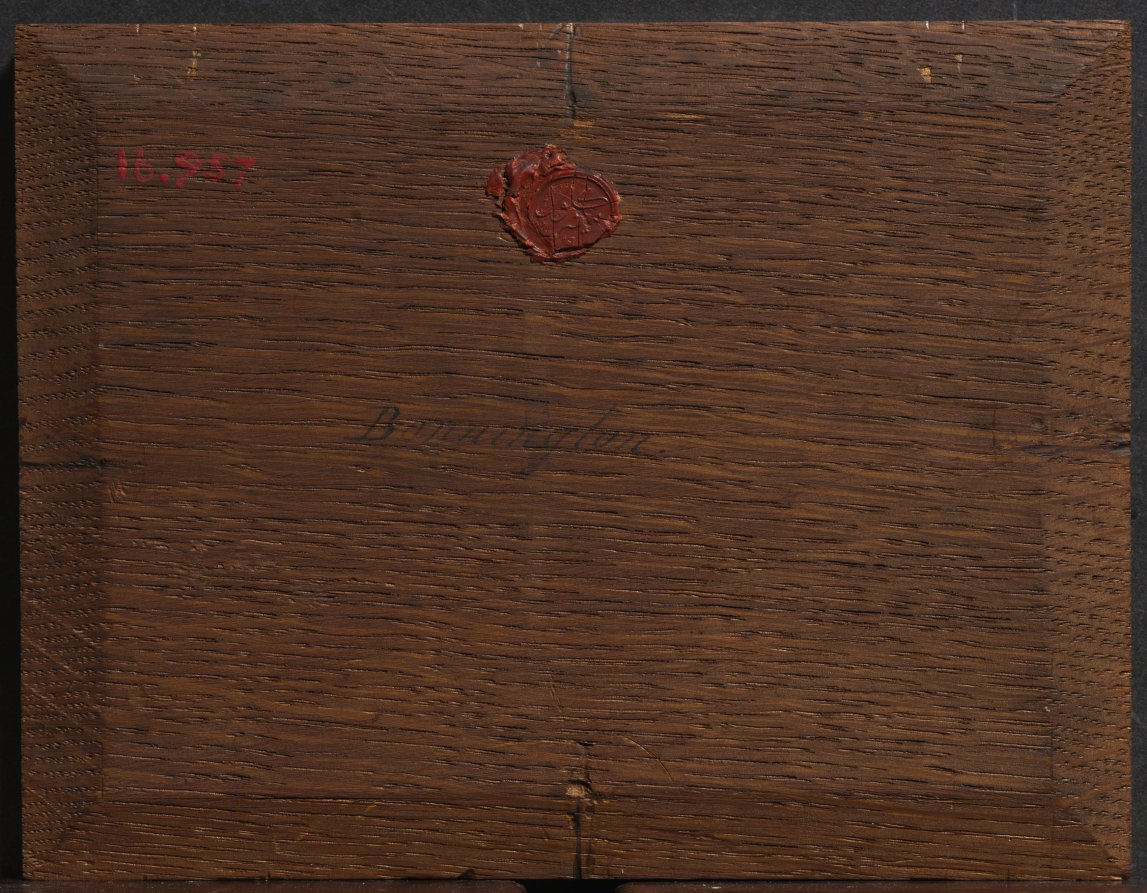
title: Battle of Poitiers, 25 October 732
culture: France, 19th century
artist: circle of Baron Charles de Steuben (French)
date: 1830s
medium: oil on pulp board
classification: Painting